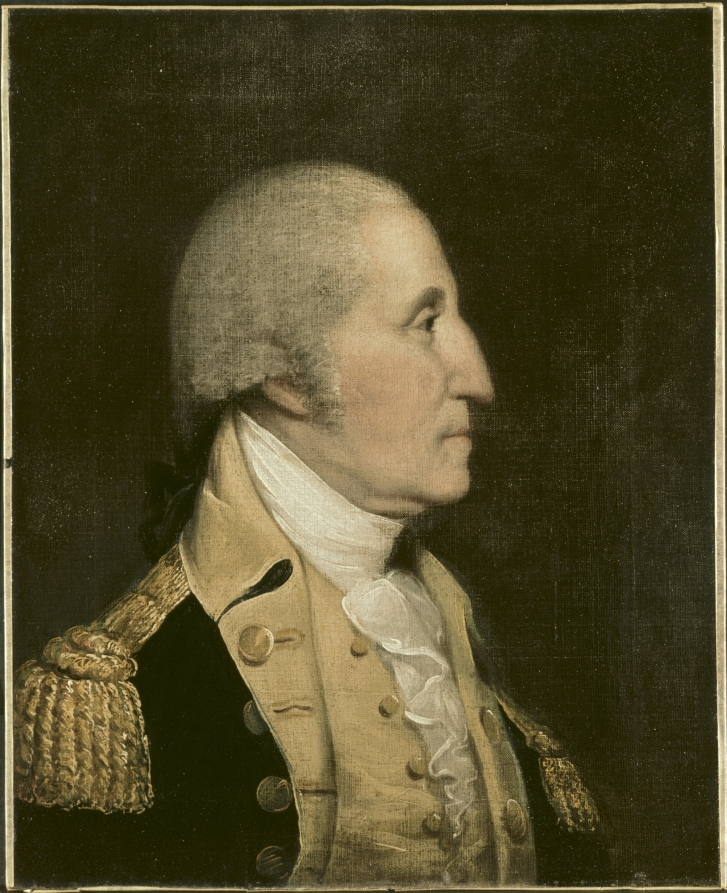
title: George Washington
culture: America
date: c. 1790s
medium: oil on canvas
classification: Painting